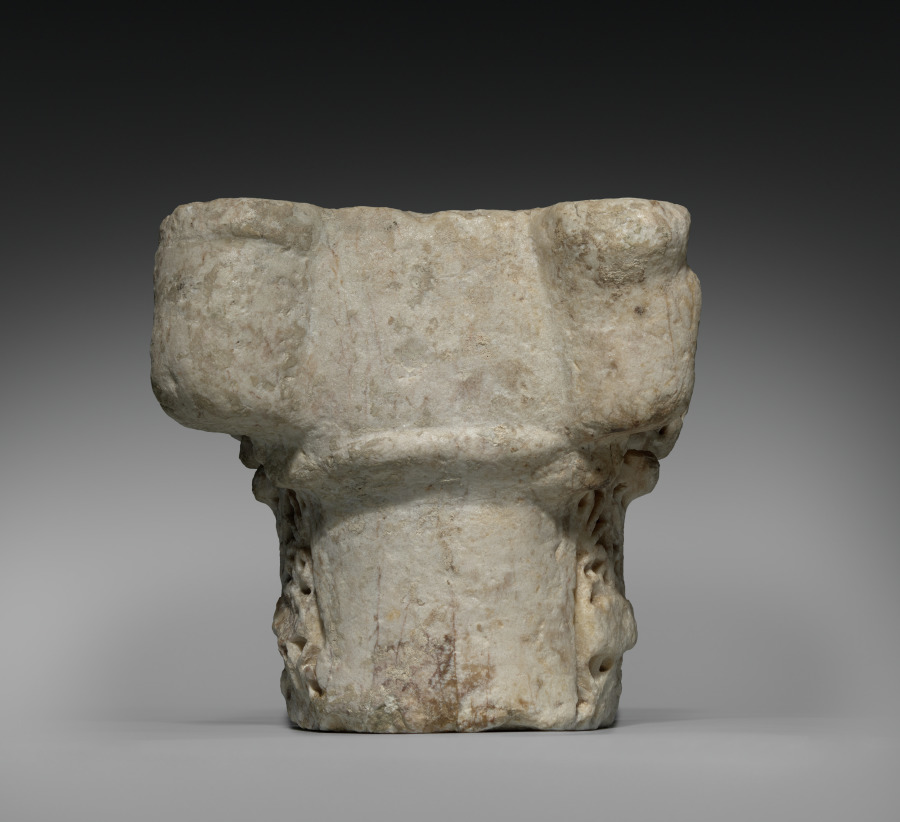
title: Column Capital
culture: Spain, Cordoba, Madinat al-Zahra, Spanish Umayyad period (756–1031)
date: c. 960–76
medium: Marble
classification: Sculpture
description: This capital comes from the palatial city of Madinat al-Zahra near Cordoba (Spain) which was begun by caliph Abd al-Rahman III (r. 912–61) around 936. Large parts of the Iberian Peninsula were then under Islamic rule and experienced a cultural flowering. The city, destroyed already in 1010, was the most magnificent palace complex in Europe at the time.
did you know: In the mid-1800s the ruins of Madinat al-Zahra were rediscovered and became the source of great fascination as people imagined a palace like that in the stories of One Thousand and One Nights.